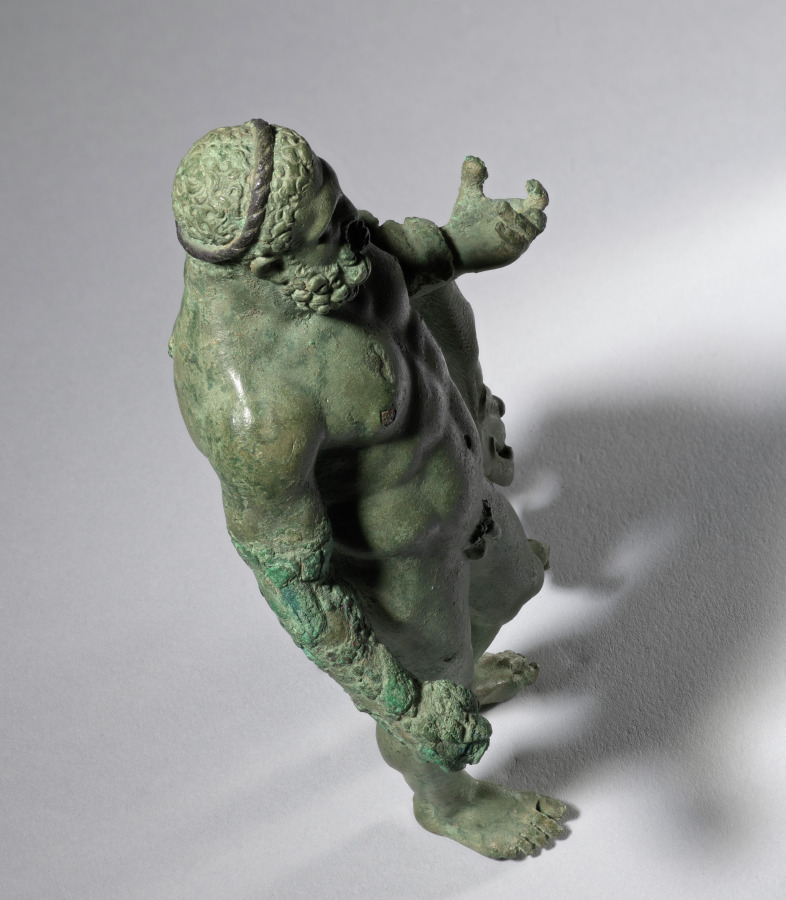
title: Hercules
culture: Italy, Rome, Early Imperial period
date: c. 30 BCE–20 CE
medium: bronze with silver and copper inlays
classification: Sculpture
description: This bronze statuette is a nude figure of the hero Hercules. He stands in a contrapposto pose, with the majority of his weight on one leg. Over his left arm, Hercules holds the skin of the Nemean Lion, having slayed the beast as part of his Twelve Labors and now carrying the pelt as a trophy. Although now mostly lost, Hercules once held his signature wooden club in his right hand. Roman artists often portrayed Hercules as middle-aged, as though greater maturity would increase his power and virility.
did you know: Hercules is the Roman name for the classical hero known in Greek as Herakles.